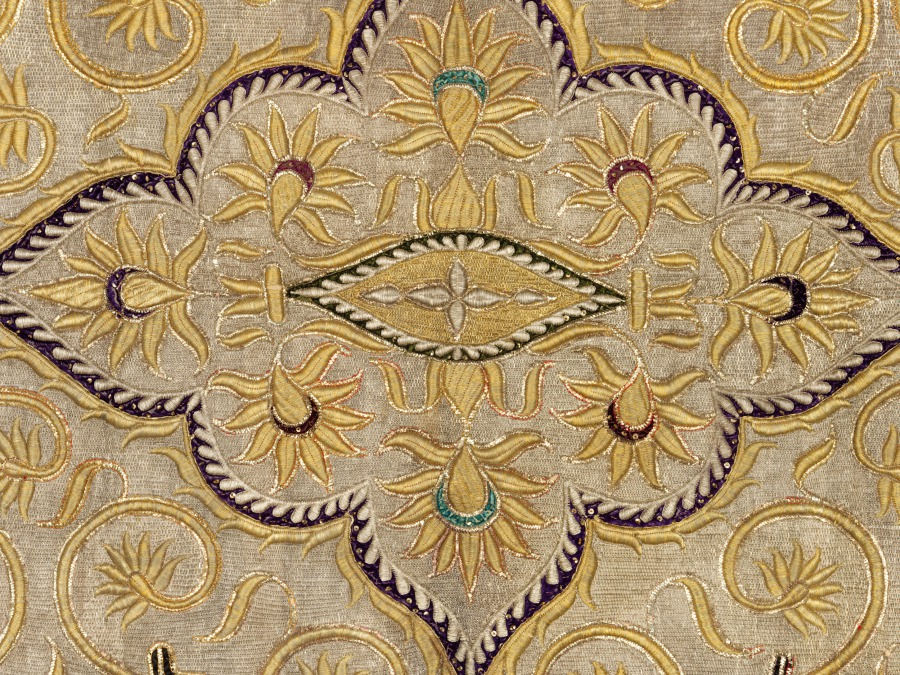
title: Embroidered Cover (?)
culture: India, 18th-19th century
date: 1700s - 1800s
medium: embroidery; silk and metallic threads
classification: Embroidery